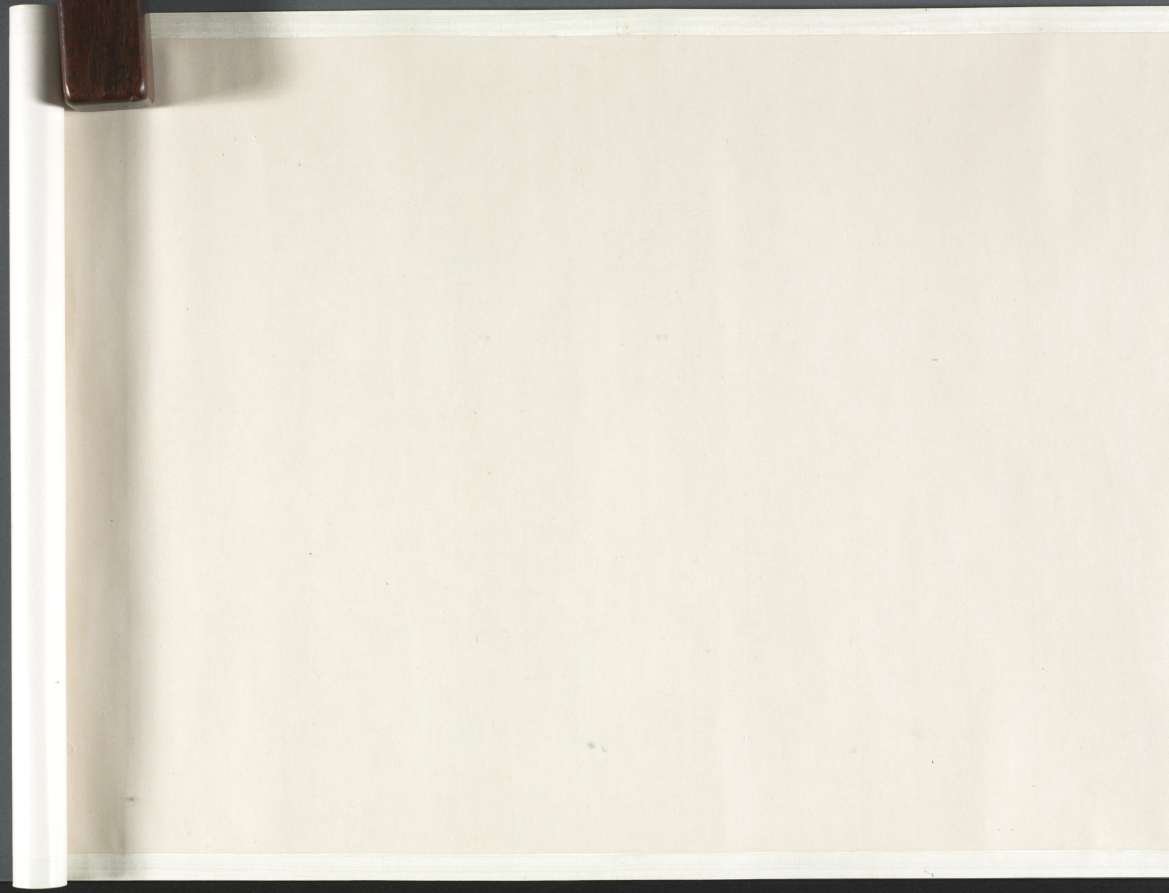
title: Buddha's Conversion of Five Bhiksu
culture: China, Yuan dynasty (1271–1368)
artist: Li Sheng (Chinese, active c. 1324–after 1375)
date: mid-1300s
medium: handscroll; ink on paper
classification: Painting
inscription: 紫篔生李升識 [印] 李氏子雲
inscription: 4 colophons and 12 additional seals: The "Heart" Sutra (Maha Prajnaparamita) text written by Wu Yuqing 吳餘慶 (active early 1400s); 2 seals of Xu Qianxue 徐乾學 (1631–1694); 3 colophons, one dated 1929 and two dated 1936, and 9 seals of Wu Hufan 吳湖帆 (1894–1968); 1 colophon, dated 1932, of Chen Dingshan; 1 seal unidentified.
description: This episode stems from the life of the historical Buddha, who, after his enlightenment, was initially hesitant about preaching his own doctrine. After much personal deliberation and prodding by deities, he finally relented. The first converts were the five guards who served him when he was still a prince. For Li Sheng, this is the pretext of the painting, which moves from the interaction of the bhiksu with the Buddha to a broader awareness of the vast surroundings of the scene.